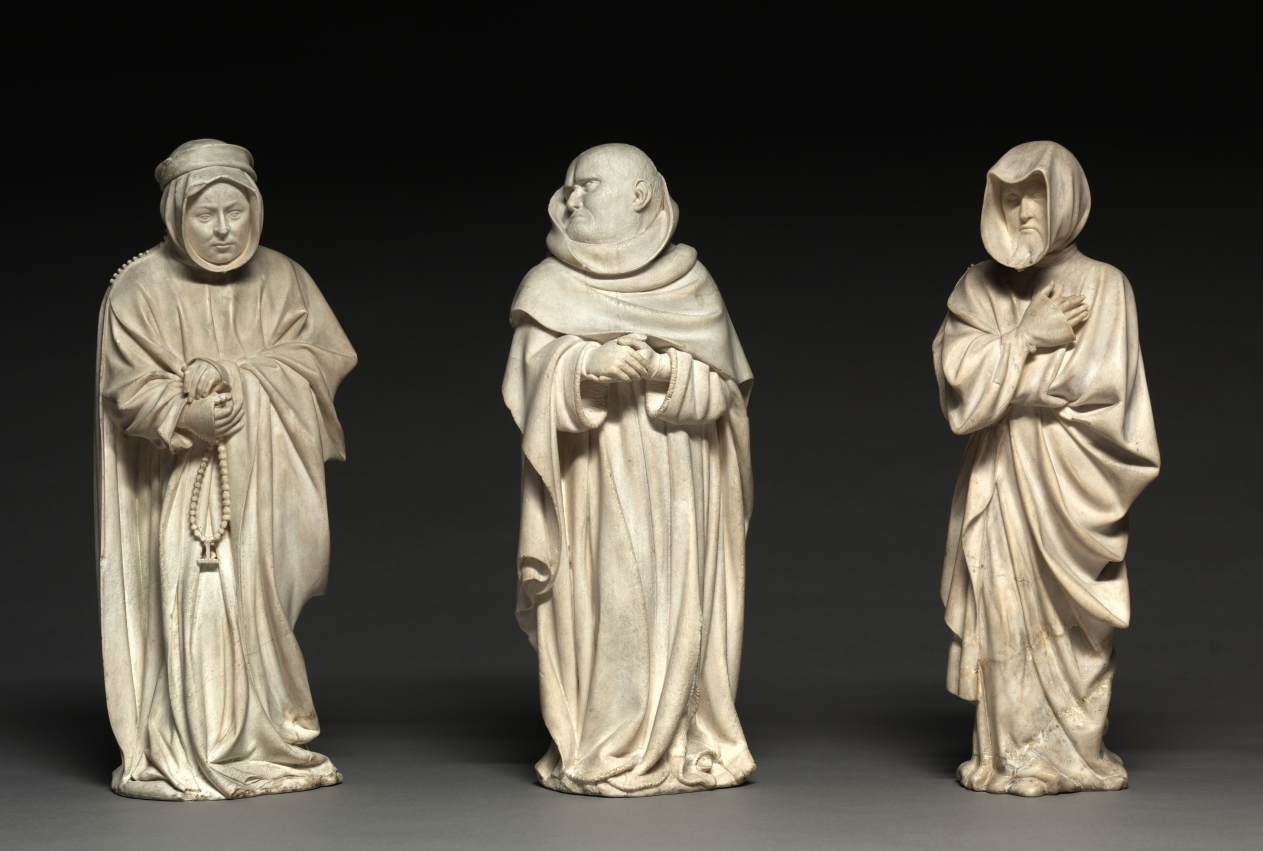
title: Mourner from the Tomb of Philip the Bold, Duke of Burgundy (1364–1404)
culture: Netherlands, active Dijon, 15th century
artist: Claus de Werve (Netherlandish, 1380–1439)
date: 1404–1410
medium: vizille alabaster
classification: Sculpture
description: This figure comes from the tomb of Duke Philip the Bold from the church of Champmol near Dijon (Burgundy, France). Philip, who founded the monastery and designated it as his burial place, hired the best artists, many of whom came from the Netherlands. While the commission was given in 1381, the work was not completed until 1410, six years after the duke’s death. This mourner is unusual for the time because it is not carved as a static low relief on the pedestal of the tomb but interacts with the viewers and their fellow procession members. The lifelike quality of the figure is due in large part to the alabaster. Its softness allowed artists to carve details into the material, and the transparent, milky white stone could also be polished to a high gloss.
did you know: During his life, Duke Philip founded the monastery of Chartreuse de Champmol to serve as a final resting place for himself and his family.